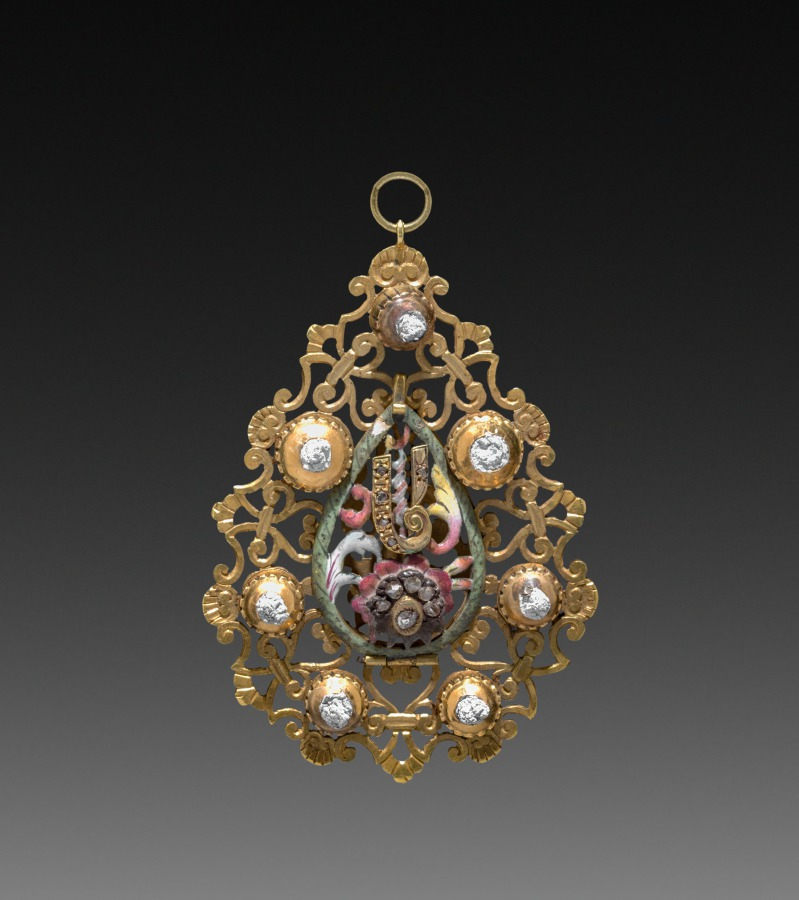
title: Pendant (part 2)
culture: Belgium, 18th century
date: 1700s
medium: silver gilt and enamel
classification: Metalwork